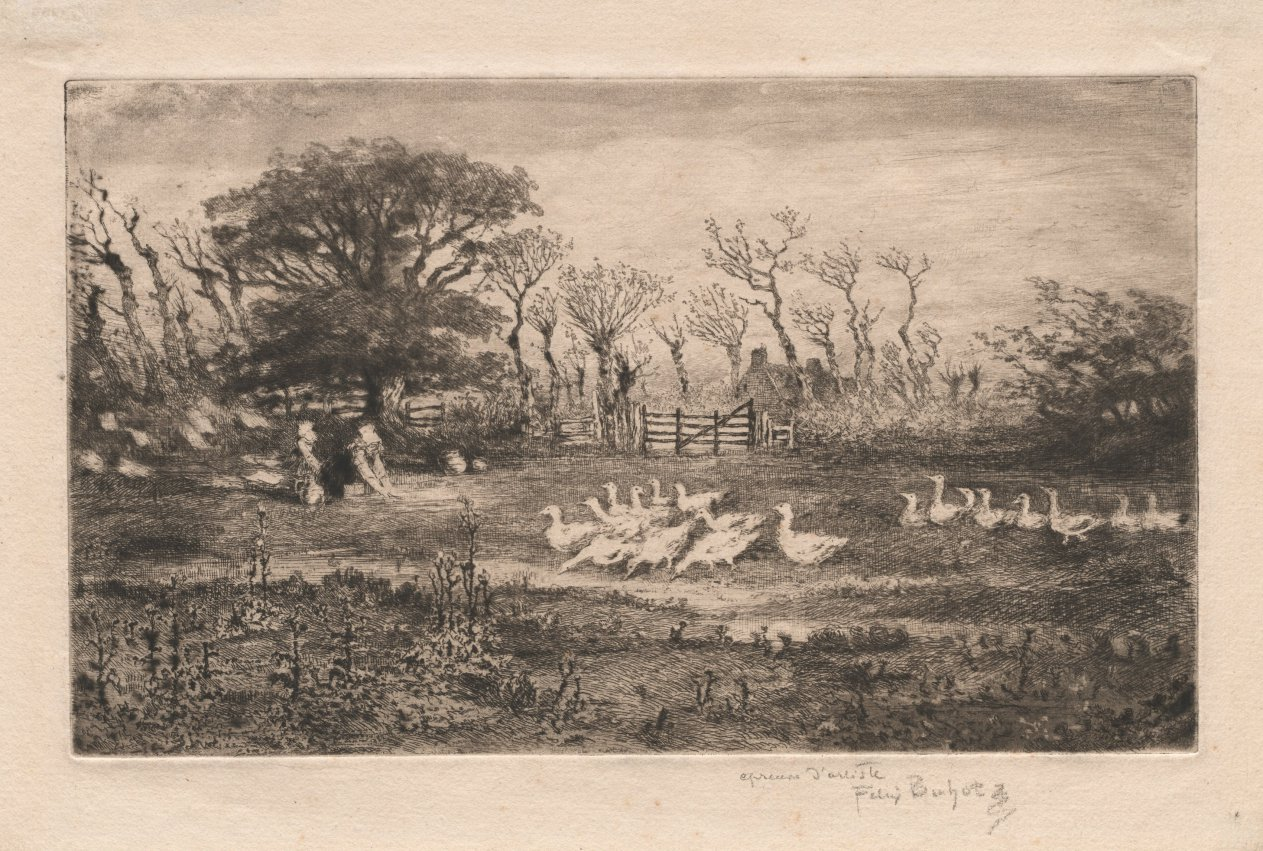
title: Geese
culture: France, 19th century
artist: Félix Hilaire Buhot (French, 1847–1898)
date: 1887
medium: etching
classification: Print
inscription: lower right, inscribed and signed in pencil: eprouve d'artiste Felix Buhot